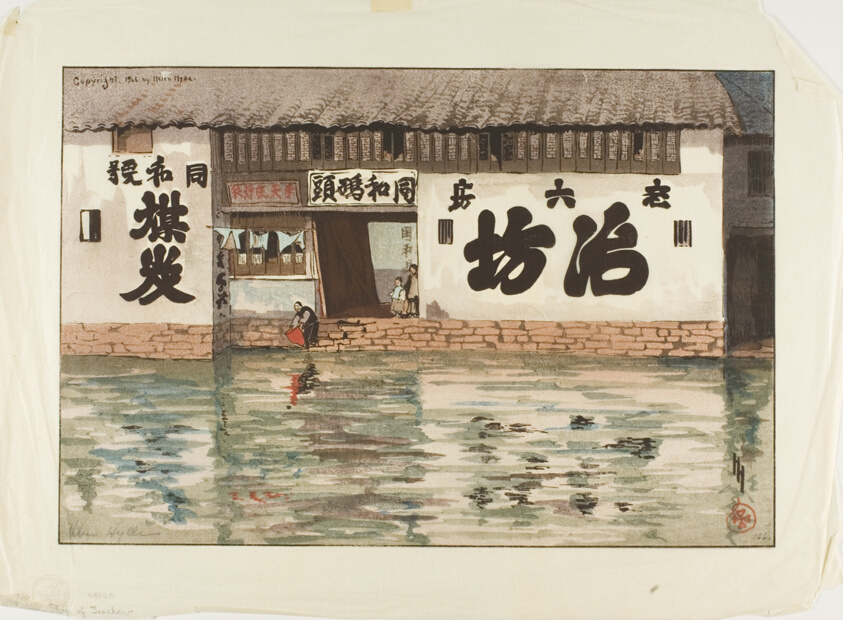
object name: Print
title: The Sauce-Pan Shop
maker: Helen Hyde (American, 1868-1919)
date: 1908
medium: Color woodcut on paper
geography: United States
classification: woodcut; print; prints and drawing